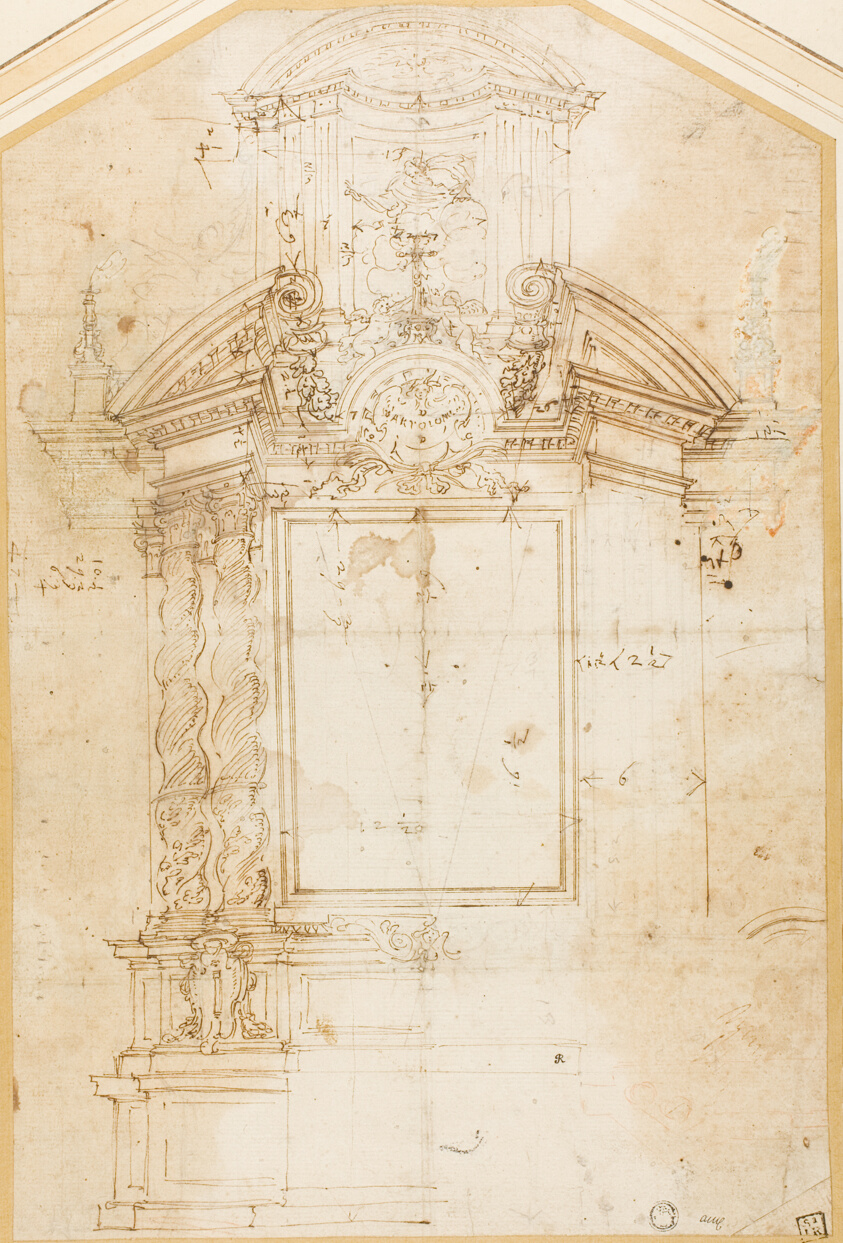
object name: Drawing and Watercolor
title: Sketch for an Altar of Saint Bartholomew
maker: Attributed to Andrea Pozzo (Italian, 1642-1709); or Giovanni Francesco Grimaldi (Italian, 1606-1680)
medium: Pen and brown ink, with graphite, on ivory laid paper, laid down on ivory laid card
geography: Italy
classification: pen and ink drawings; drawings (visual works); prints and drawing